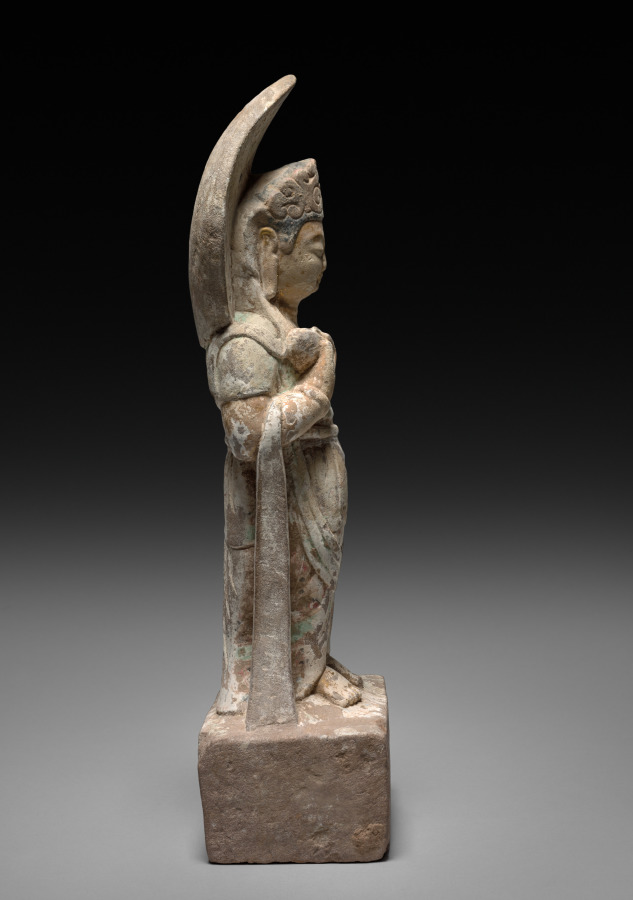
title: Bodhisattva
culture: China, Sui dynasty (581-618) - Tang dynasty (618-907)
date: late 500s–early 600s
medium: stone with polychromy and gilding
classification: Sculpture